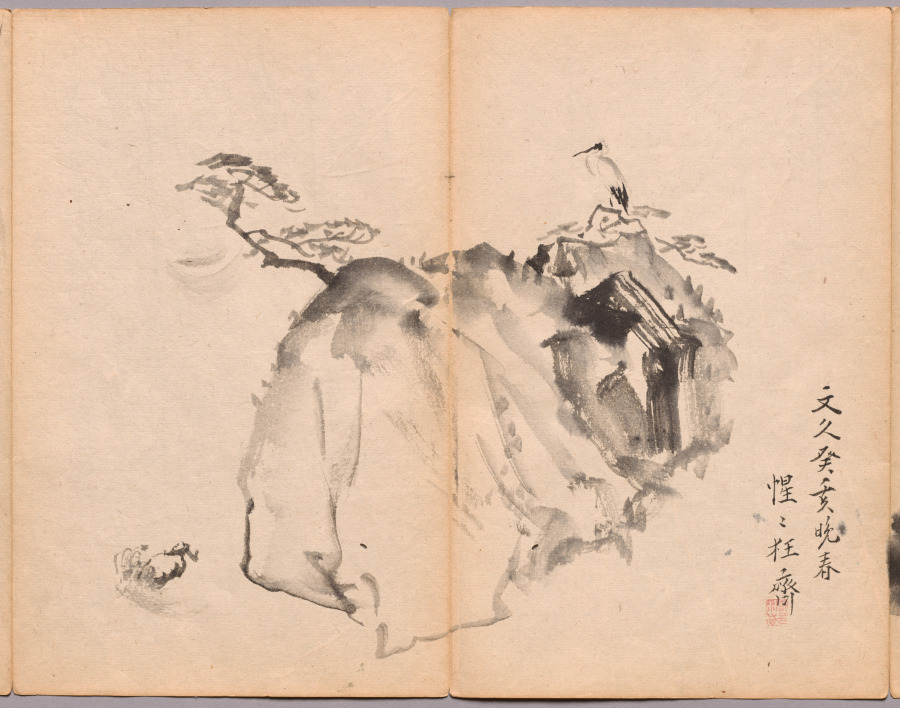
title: Cranes and Pines in Moonlight from Sketch Album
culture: Japan, Edo period (1615–1868) to Meiji period (1868–1912)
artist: Kawanabe Kyōsai (Japanese, 1831–1889)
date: mid- to late 1800s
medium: Accordion-style book of 26 double-leaves; ink and color on paper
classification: Bound Volume